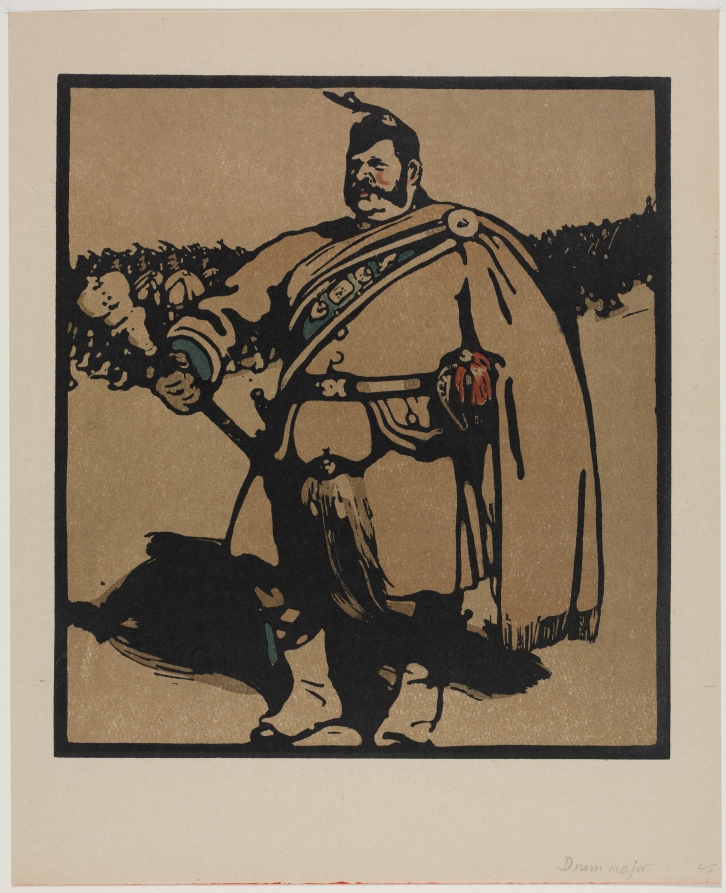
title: London Types: The Drum Major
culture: England, 19th century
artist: William Nicholson (British, 1872–1949)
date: 1898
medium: color lithograph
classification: Print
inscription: Lower right, in pencil (not artist's hand): "Drum major 45."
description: London Types celebrates the affection residents felt for their city at the end of the 19th century. The series includes many depictions of women because the publisher William Heinemann, a strong supporter of the struggle for equality, advised the artist to represent both sexes equally. The scenes document London of the 1890s with contemporary references.